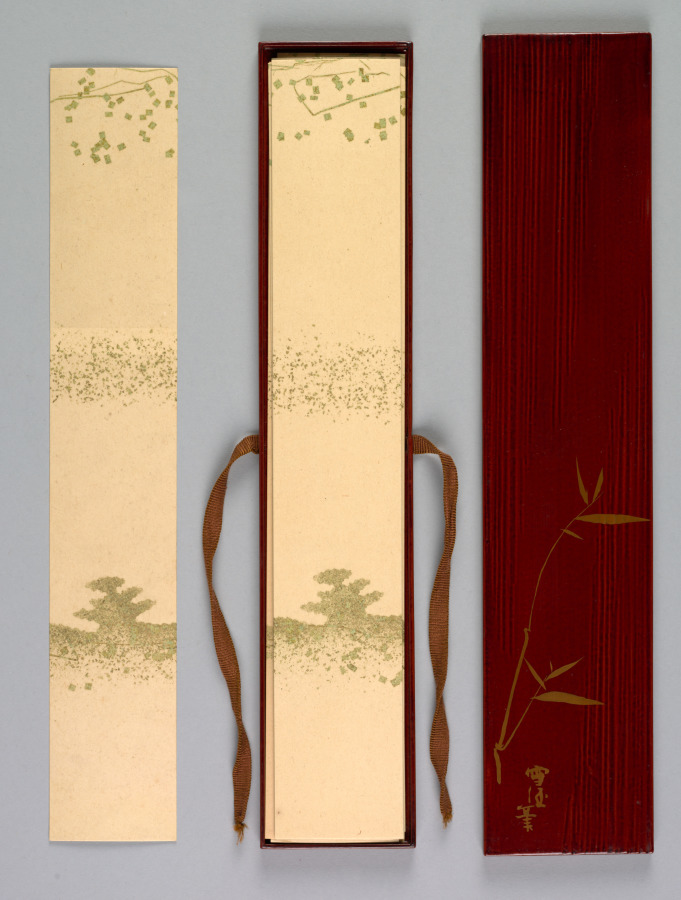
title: Poem Card Box with Lid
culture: Japan, Meiji period (1868–1912)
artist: Kamisaka Sekka (Japanese, 1866–1942)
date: 1868–1912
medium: wood with lacquer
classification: Lacquer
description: Long, decorated cards for the calligraphic presentation of poems are called tanzaku in Japanese. This box is a collaboration between the designer Kamisaka Sekka and the lacquer artist Iwamura Sadazō. Together, they crafted this box with a golden bamboo lid, and filled it with cards decorated with gold leaf designs.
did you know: Poems written on long poetry cards, or tanzaku, are often collected into albums called tekagami in Japanese.